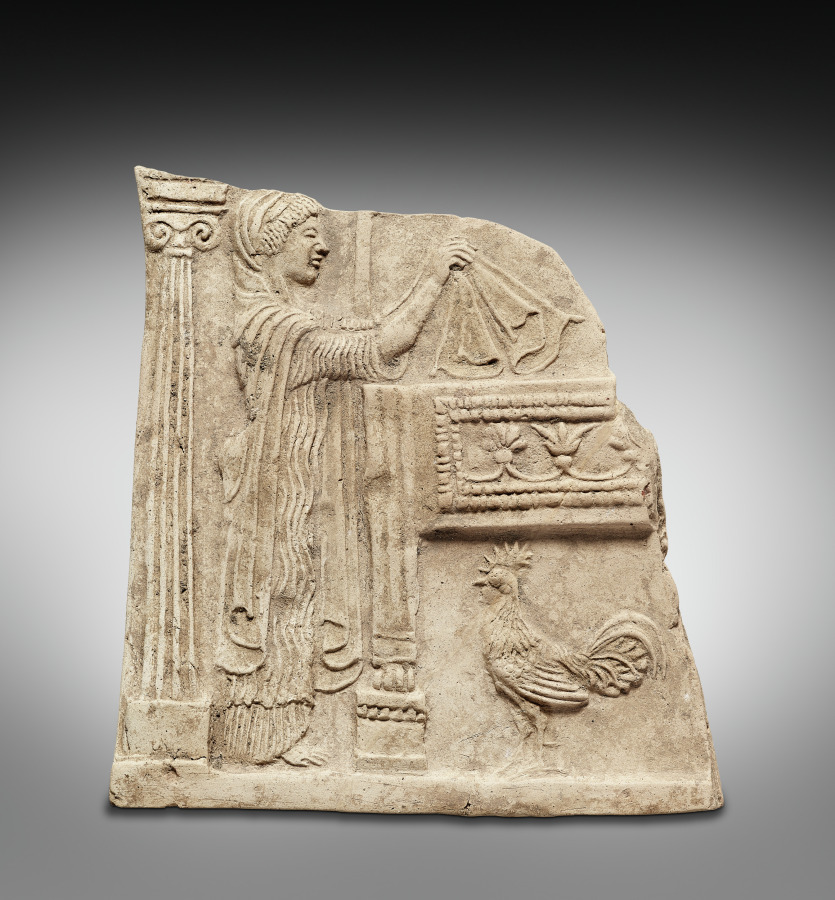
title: Votive Plaque (Pinax) with Persephone Making her Bridal Bed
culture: West Greek/South Italian, Classical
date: c. 490–450 BCE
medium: Terracotta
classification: Plaque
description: Probably once brightly painted, this relief plaque belongs to a series of votive dedications made in Locri Epizephirii, near the “toe” of Italy, to the goddess Persephone (or Kore), daughter of Demeter. Following her abduction by Hades, god of the Underworld, Persephone regularly returned to earth, dictating the seasons and making agriculture possible. Often, as here, the plaques show domestic scenes.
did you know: The rooster often appears with Persephone on such plaques, perhaps because both mark transitions.